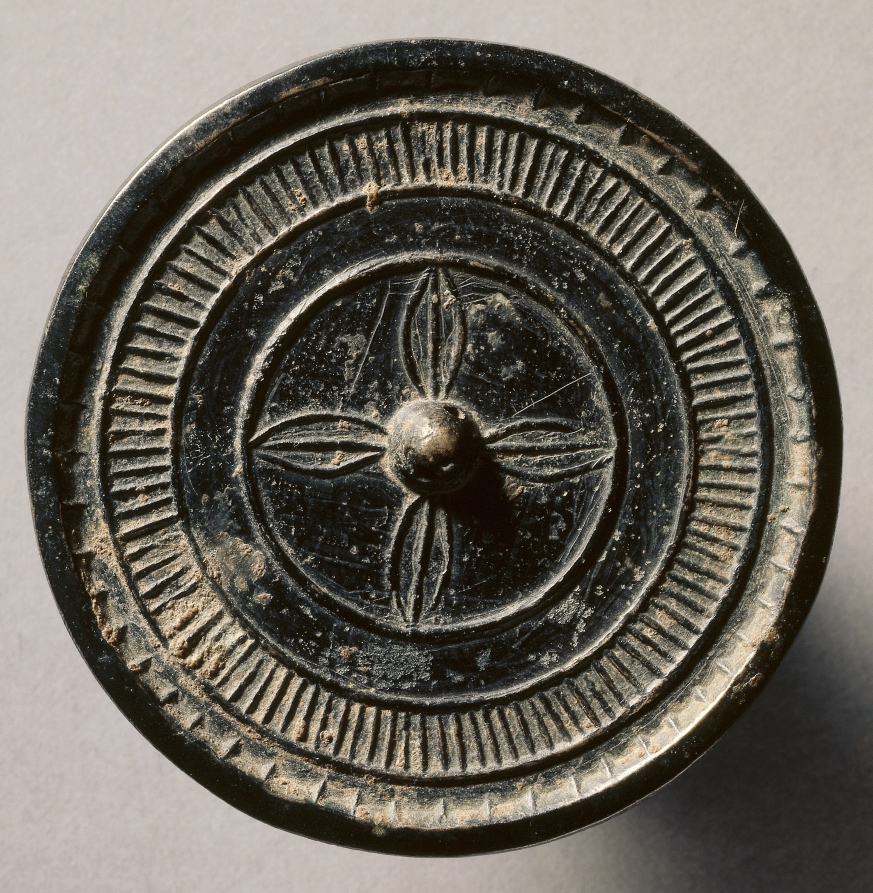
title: Mirror with Four Leaves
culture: Eastern Anatolia or Northern Mesopotamia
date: 1100s–1200s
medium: bronze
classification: Metalwork